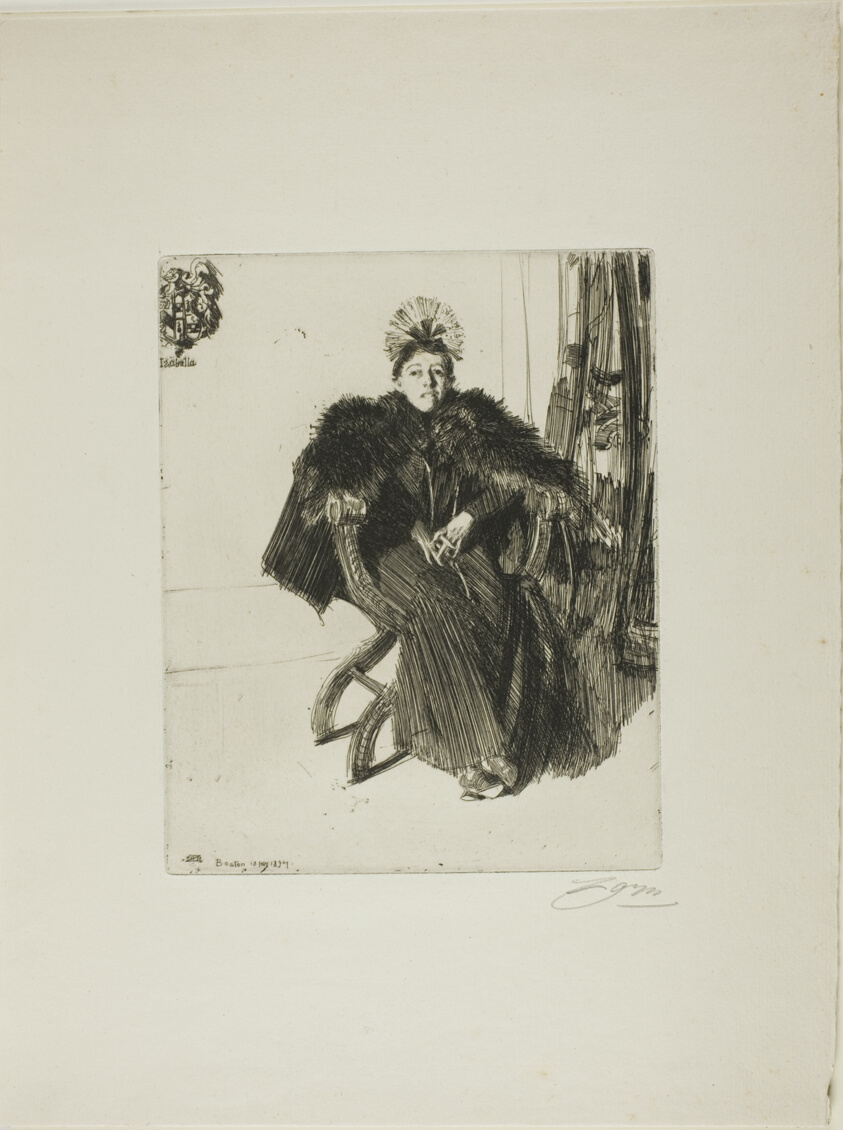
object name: Print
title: Isabella Gardener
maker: Anders Zorn (Swedish, 1860-1920)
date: 1894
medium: Etching on ivory laid paper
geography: Sweden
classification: etching; print; prints and drawing